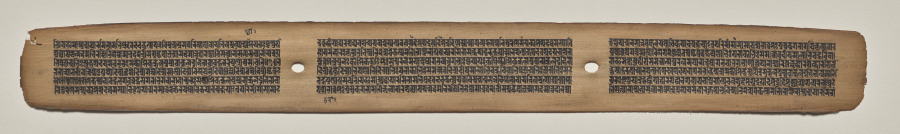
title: Text, Folio 22 (recto), from a Manuscript of the Perfection of Wisdom in Eight Thousand Lines (Ashtasahasrika Prajnaparamita-sutra)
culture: Eastern India, Bihar, Vikramashila Monastery. Painting: Nepal, Kathmandu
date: Sunday, September 14, 1119 (year 239 of the Newar Samvat in the month of Ashvina)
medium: gum tempera and ink on palm leaves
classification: Painting